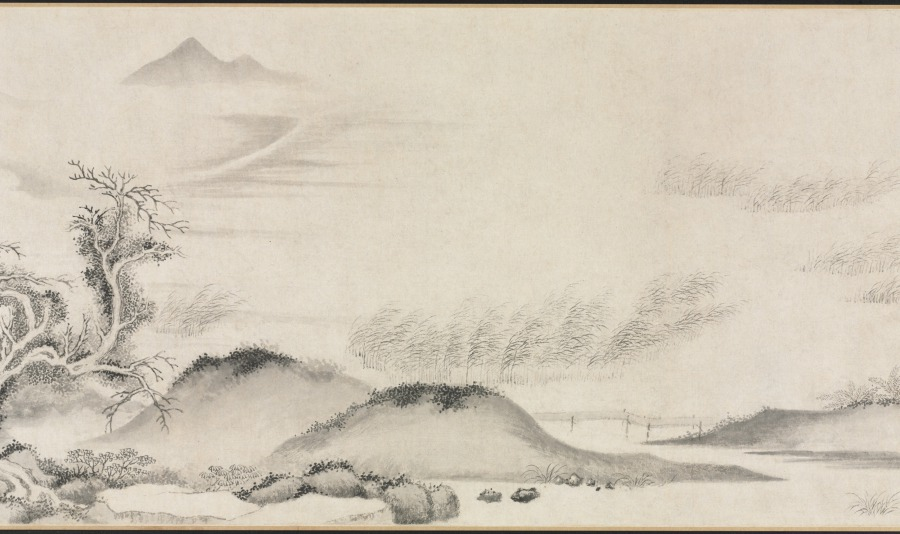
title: Water Village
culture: China, Ming dynasty (1368–1644)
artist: Wen Boren (Chinese, 1502–1575)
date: 1570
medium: handscroll; ink and light color on paper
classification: Painting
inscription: 隆慶庚午秋仿趙文敏筆. 五峰文伯仁 [印] 五峰山人; 文伯仁印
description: In the autumn of 1570, Wen Boren painted this seemingly unemotional scene of low-lying marshlands with a chain of rounded mountains in the background. A fishing boat is nestled on the shore near the village. Although paths and bridges traverse the landscape, only two people are visible in the stillness. From the restrained atmosphere of this landscape, one would never guess that Wen Boren was known as the “bad boy” of the Wu School for his explosive temper. As a younger man, he was even embroiled in a contentious lawsuit with his own uncle, Wen Zhengming (1470–1559), a master of Ming dynasty painting with whom he had trained. The ideal of the scholar-painter, or literati, was that an artist’s moral character is reflected in his paintings, so there was great incongruity between Wen Boren’s difficult personality and his restrained landscapes. A contemporary, Wang Shizhen, wrote this about him: "This gentleman is prone to behave odiously and screamed accusations at people. How is it possible for him to carry in his bosom such a wealth of scenic wonders?" Who knows what effort it took to subdue his fractious spirit to project an image of coolness and refined taste in his paintings?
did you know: A foreground tree has an eccentric twisting silhouette and pepper-dot "halo" of leaves.